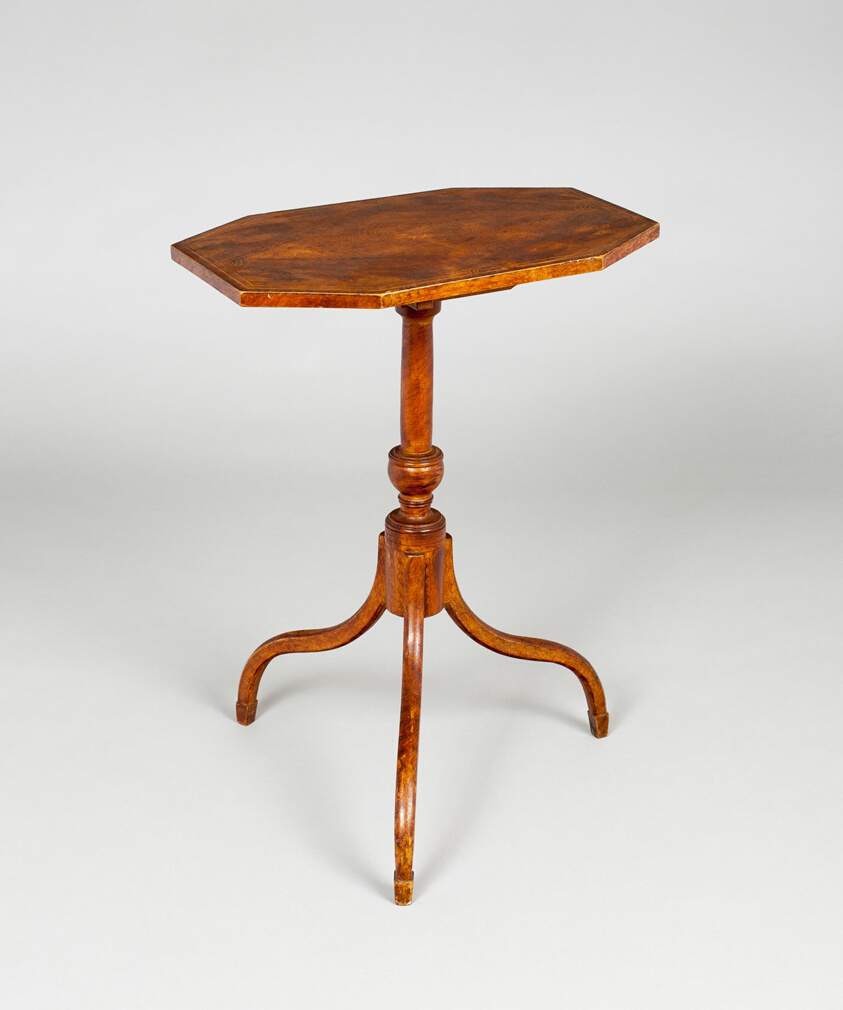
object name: Furniture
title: Stand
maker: Artist unknown (American, 18th–19th century); Coastal New Hampshire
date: c. 1790–1810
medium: Birch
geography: New Hampshire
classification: furniture accessory; american decorative arts; american arts; furniture